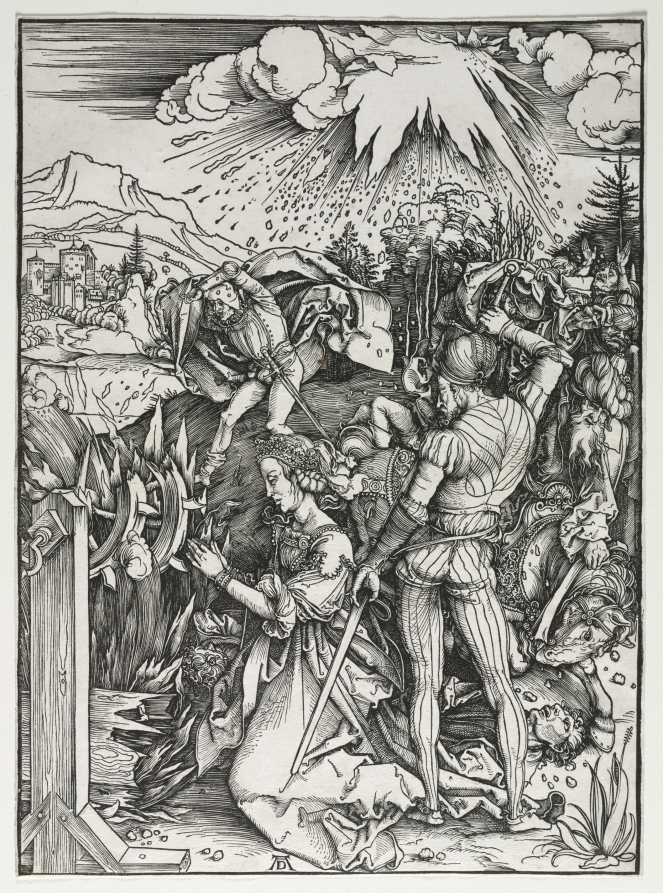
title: The Martyrdom of Saint Catherine of Alexandria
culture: Germany, late 15th-early 16th Century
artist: Albrecht Dürer (German, 1471–1528)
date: c. 1497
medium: woodcut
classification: Print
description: Saint Catherine was among the most popular virgin martyrs during this period and was particularly venerated in Dürer’s hometown of Nuremberg for her intermediary role between the faithful and God. A princess from Alexandria, Catherine was condemned to die on spiked wheels by the Roman emperor Maxentius because of her Christian faith. In answer to her prayers, God destroyed the wheels with such force that 4,000 pagans were killed. Afterward, Catherine was willingly decapitated. Dürer’s focus on Catherine’s peaceful acceptance in the midst of destruction conveys the power she derived from her chastity and unwavering faith, providing an excellent example for ordinary women to follow.